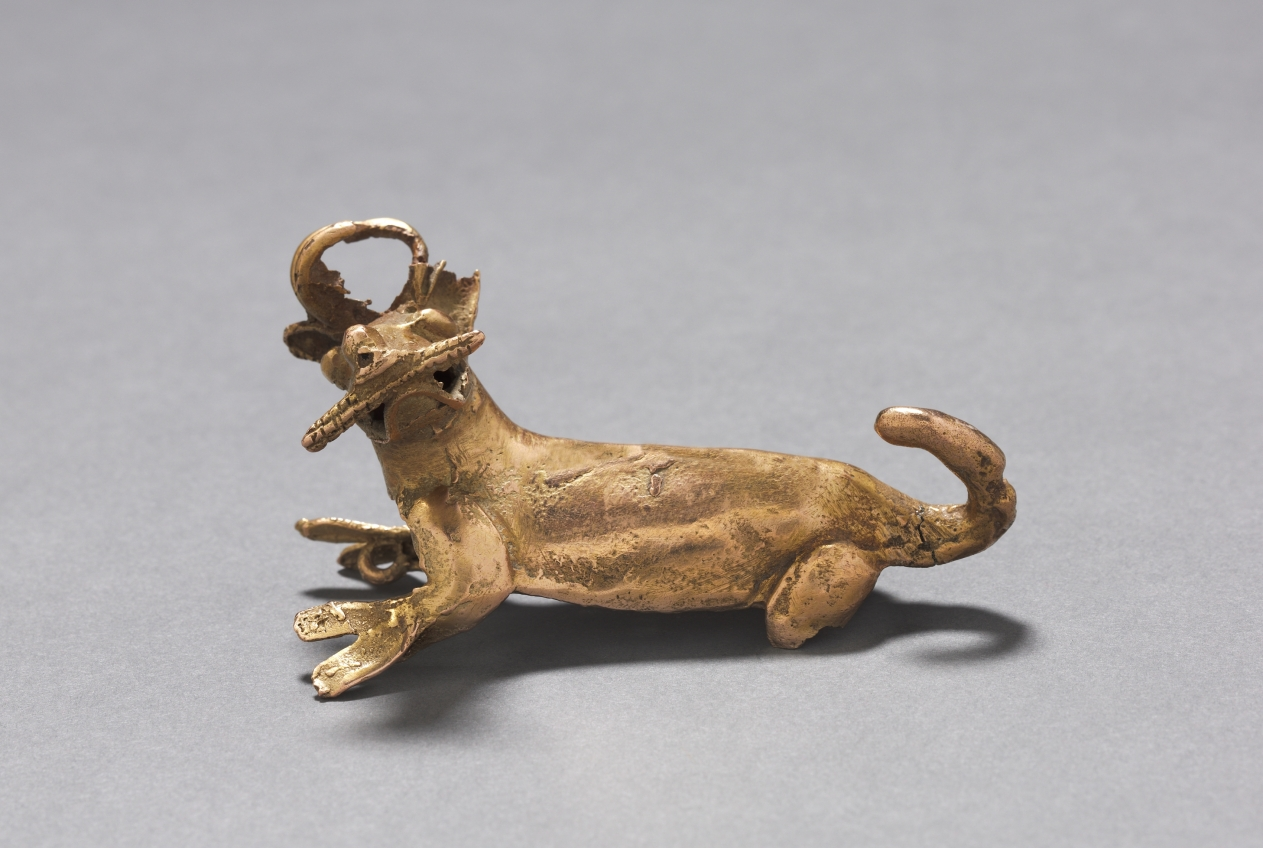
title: Deer Eating Corn Pendant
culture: Southern Costa Rica, (Diquís Region), Diquís Style, 11th-16th century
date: c. 1000–1550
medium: cast gold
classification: Metalwork